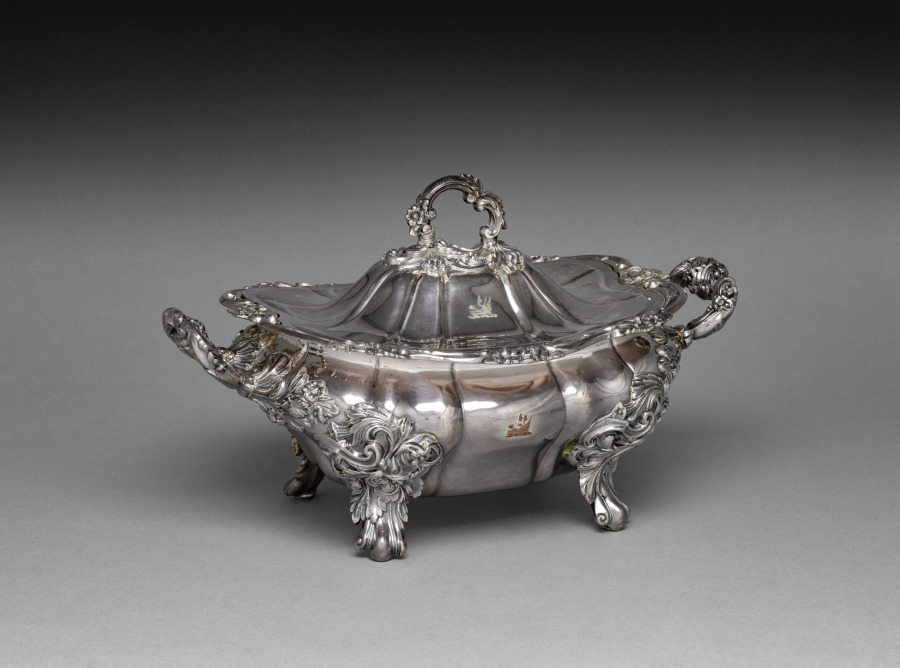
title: Covered Tureen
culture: England, Sheffield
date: c. 1830–50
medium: Silver plated on copper (Old Sheffield Plate)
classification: Silver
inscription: Four boars head crests: Two on either side of the vessel and two on either side of the lid.